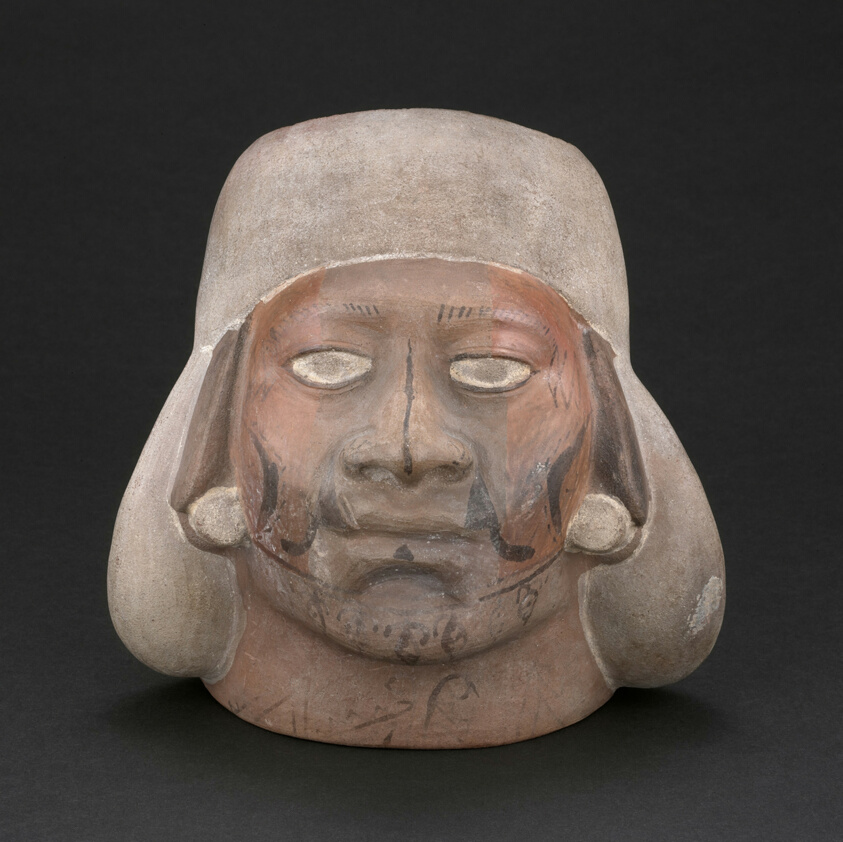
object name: Vessel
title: Portrait Vessel of a Young Man with a Scarred Lip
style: moche, mochica, early intermediate period, Pre-Columbian, americas, andes, Arts of the Americas, andean, south american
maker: Moche (North coast, Peru)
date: 100 BCE–500 CE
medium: Ceramic and pigment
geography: Peru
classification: art of the americas; vessel; ceramics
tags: people, portraits